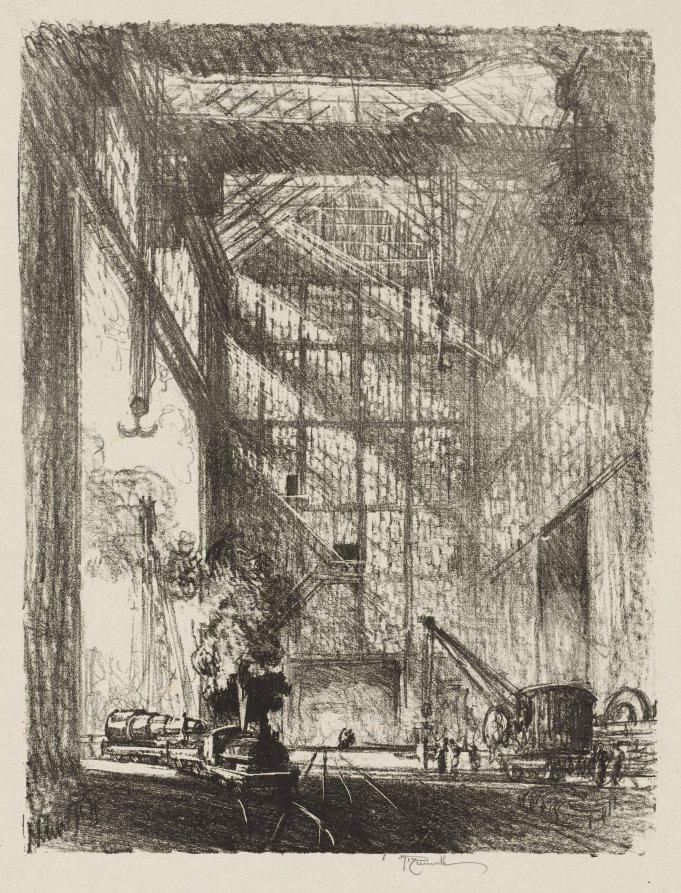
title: English War Work: Bringing in the Gun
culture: America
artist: Joseph Pennell (American, 1857–1926)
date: 1916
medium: lithograph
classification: Print